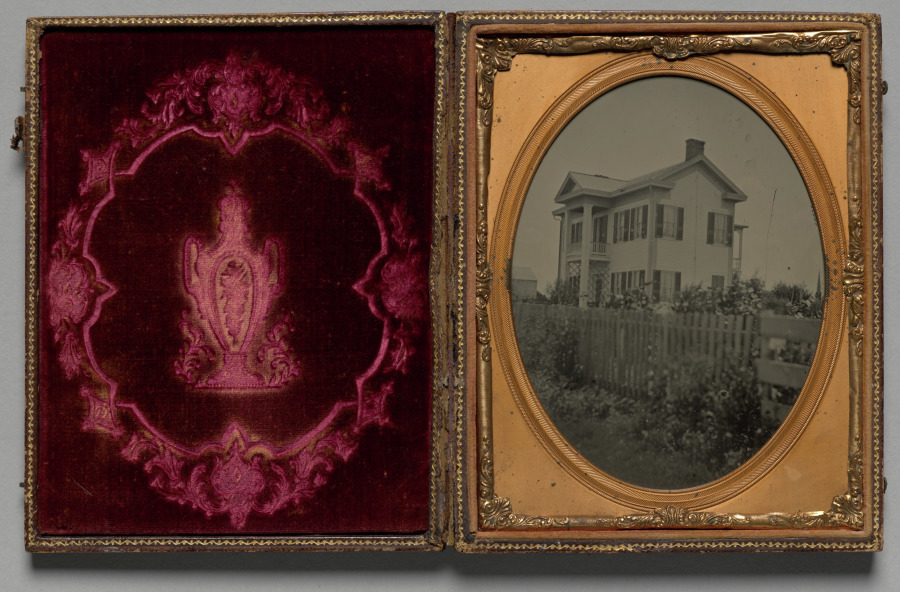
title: Homestead with picket fence and flowers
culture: America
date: c. 1857–65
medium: ambrotype, half plate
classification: Photograph